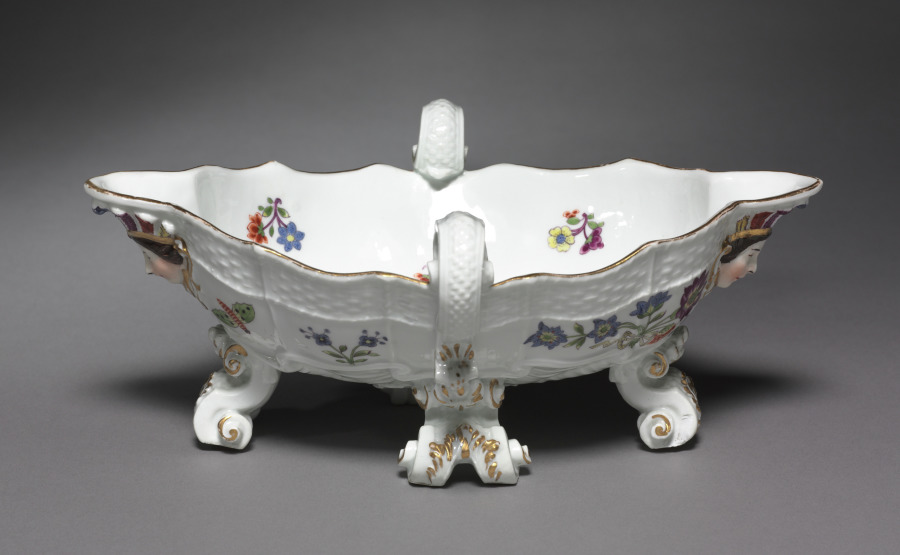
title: Sauceboat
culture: Germany, Meissen, Johann Joachim Kandler period 1735-56, 18th Century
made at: Meissen Porcelain Factory (German, est. c. 1710)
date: 1735–56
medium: porcelain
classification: Ceramic